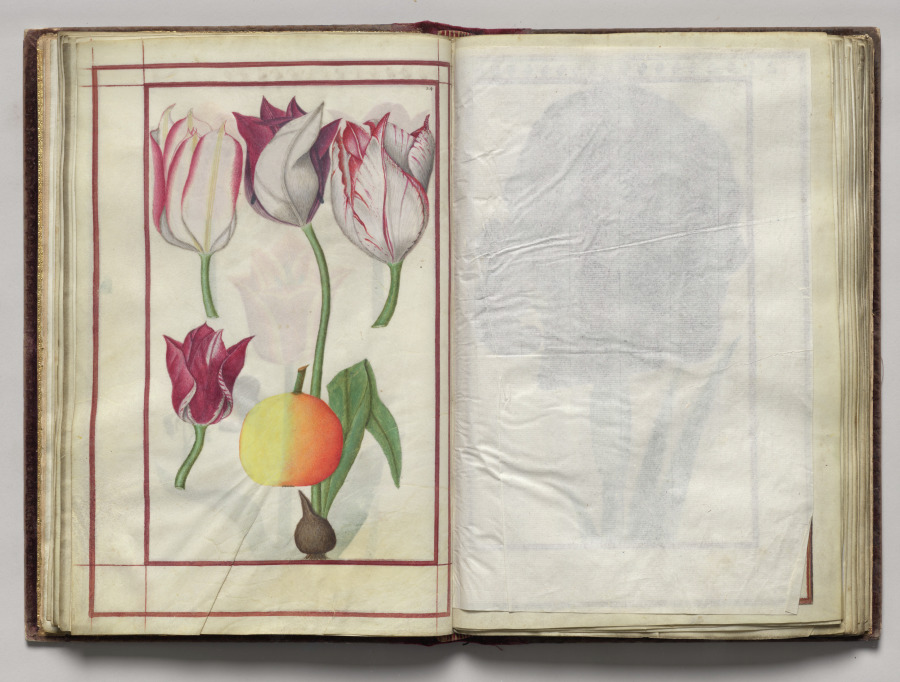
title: Tulips and Fruit, folio 14 (verso), from Florilegium (A Book of Flower Studies)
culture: France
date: 1608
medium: watercolor, ink, silver, and gold over occasional traces of pencil, on vellum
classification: Bound Volume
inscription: Dated: Poitiers 1608 (on frontispiece) Signed: On frontispiece in black ink, lower right: Van Kuyk Notation on drawing: Frontispiece: in pencil, lower margin: * élève de Van Kessel, peintre flammand (* in pencil also appears in front of Van Kuyk's name).